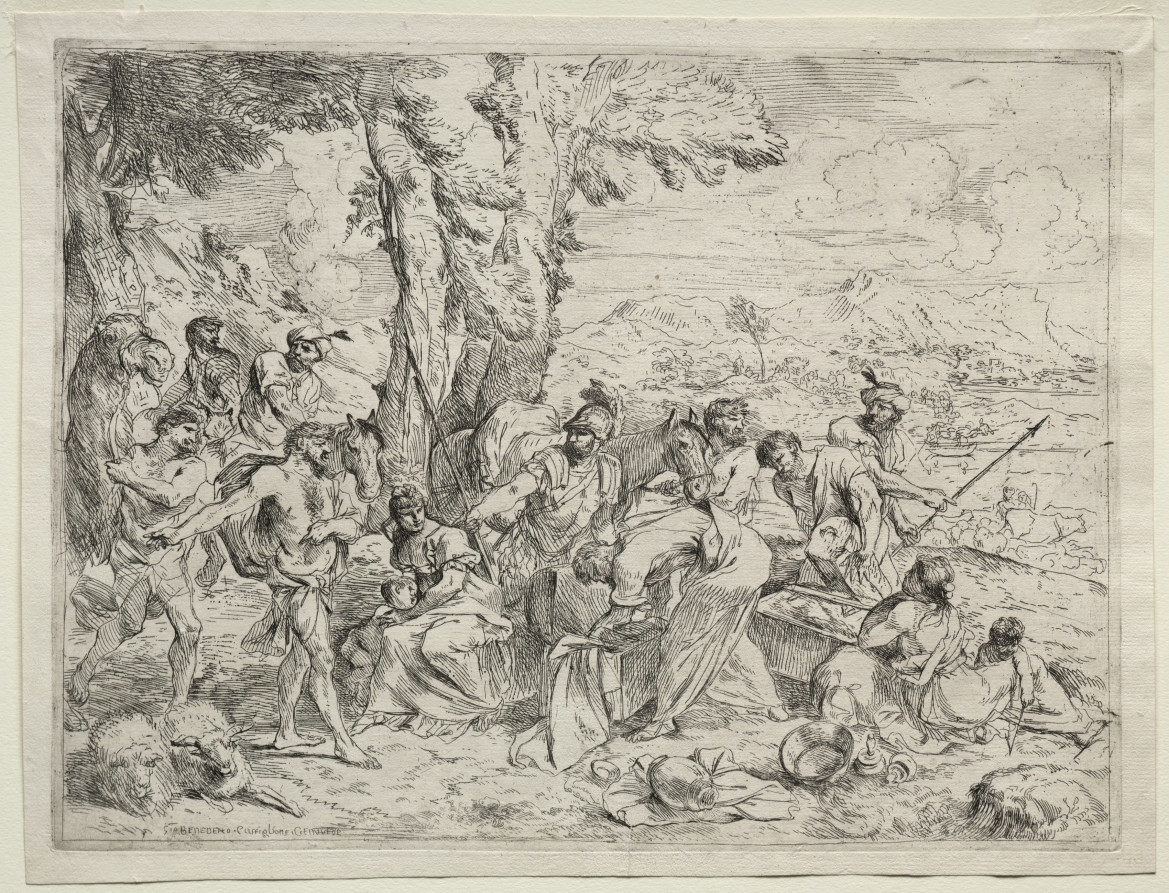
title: Laban Searching for Idols in Rachel's Baggage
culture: Italy, 17th century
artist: Giovanni Benedetto Castiglione (Italian, 1609–1664)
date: c. 1635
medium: etching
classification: Print